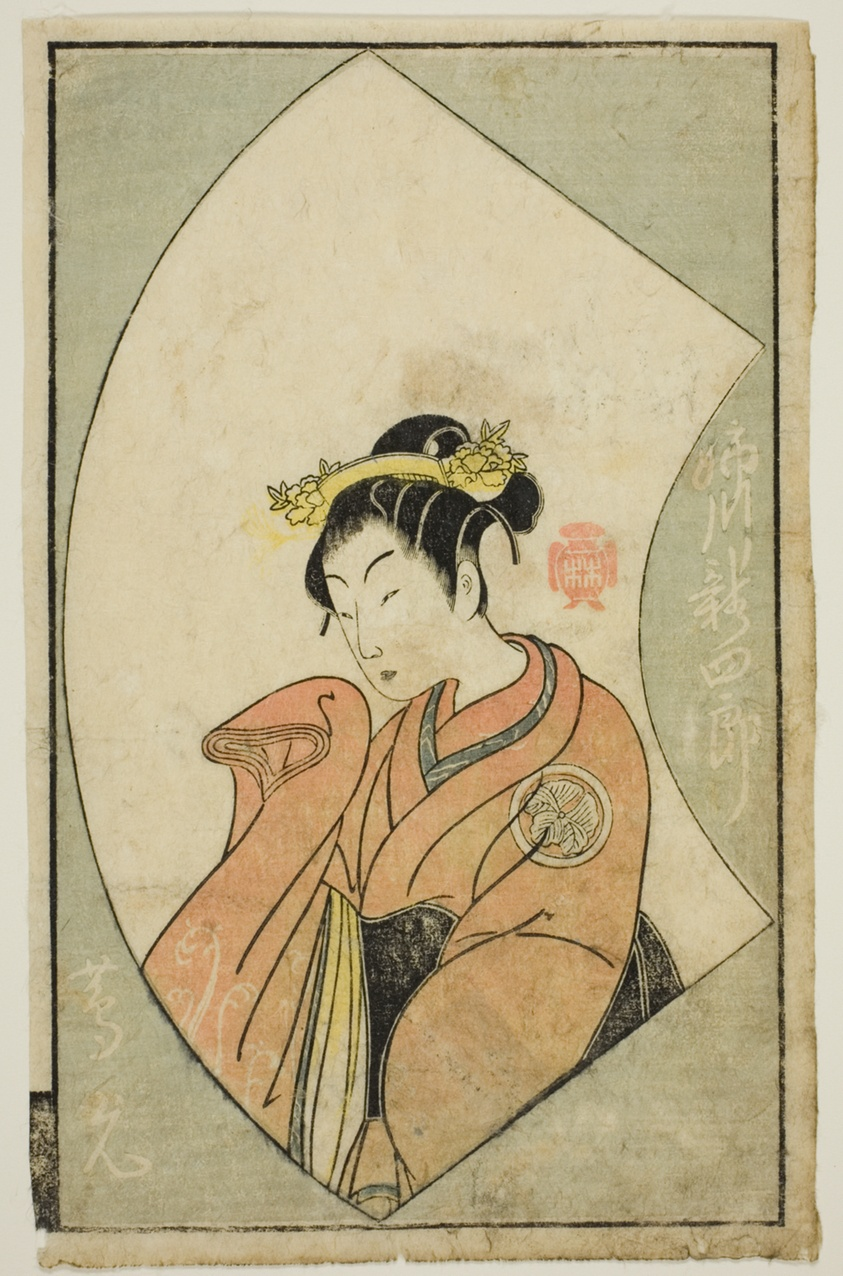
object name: Print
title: The Actor Anegawa Shinshiro II, from "A Picture Book of Stage Fans (Ehon butai ogi)"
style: Japanese (culture or style)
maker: Katsukawa Shunsho 勝川 春章; Japanese, 1726-1792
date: 1770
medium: Color woodblock print; page from illustrated book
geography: Japan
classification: woodblock print; print; asian art